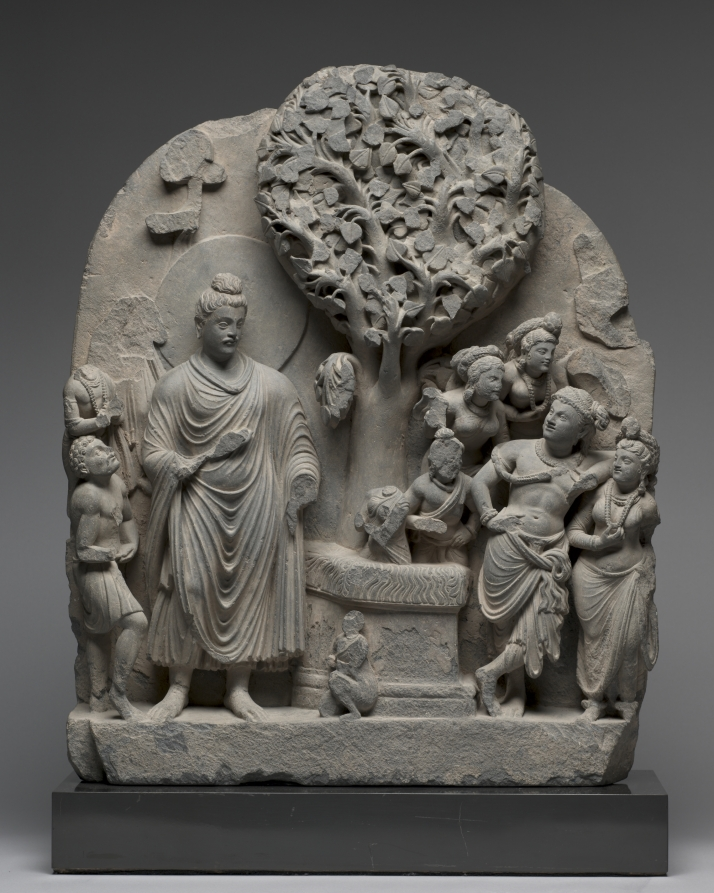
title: Siddhartha at the Bodhi Tree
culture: Pakistan, Gandhara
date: 100s–200s CE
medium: schist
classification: Sculpture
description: The tree under which the Buddha reached enlightenment marks the center of the composition. It had been under worship by local villagers, for it was known to be the residence of a nature divinity, who here emerges from the tree and altar to praise the Buddha. The altar itself is covered with kusha grass used in the context of sacrificial offerings. At the base of the altar, the earth goddess has risen from the ground and kneels before him in reverence.